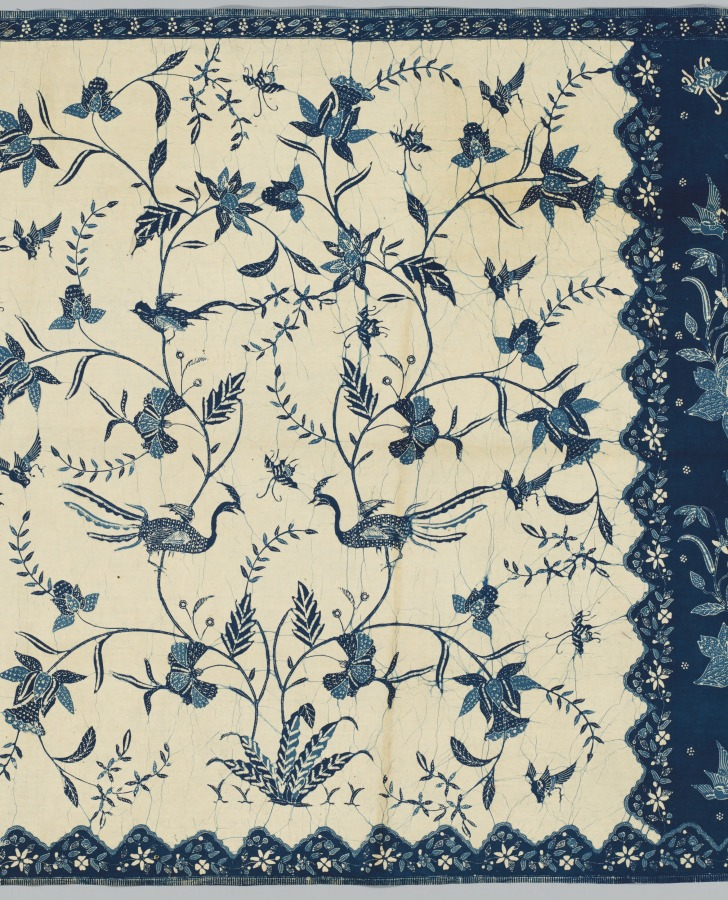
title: Sarong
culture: Indonesia, Java, North Coast, mid-19th century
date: mid-1800s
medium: Cotton: plain weave, wax-resist dyed (batik)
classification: Textile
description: Batiks made in the North Coast region of Java, specifically in Pekalongan, were influenced by both Indian and European motifs due to the Dutch presence in Indonesia. In this sarong we see a mixture of Indian and European flowers including jasmine, lilac, and daffodil. Batik is a wax-resist dyeing technique used throughout Java. Hot wax is applied with a tool known as a canting and a design is hand drawn with incredible skill. This sarong was then dyed with indigo, a well sought after and culturally important natural dye. Areas on the fabric with wax will not accept the indigo dye, hence the term wax-resist.